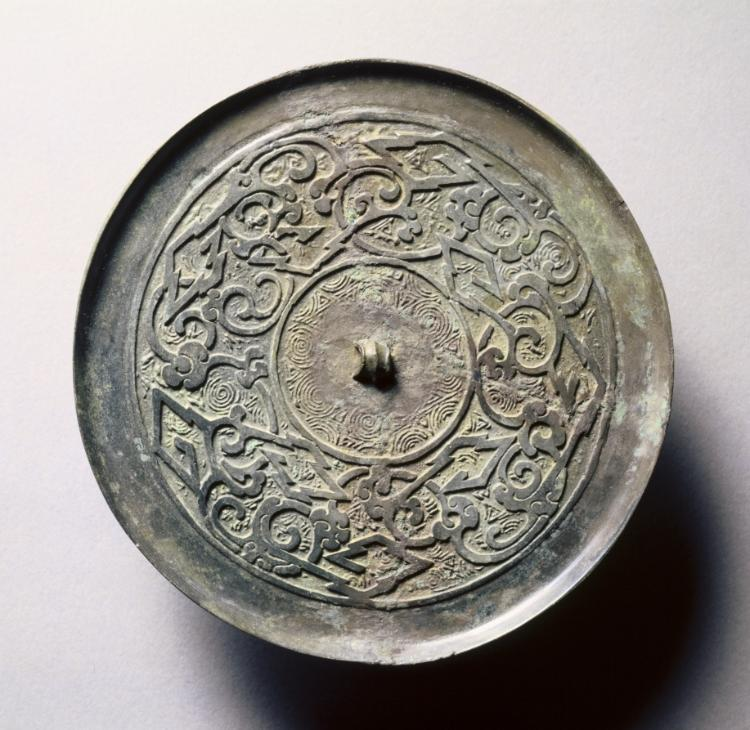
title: Mirror with Serpentine Interlaces and Angular Meanders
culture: China, Eastern Zhou dynasty (770–256 BCE), Warring States period (475–221 BCE)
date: early 500s–late 300s BCE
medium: bronze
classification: Metalwork